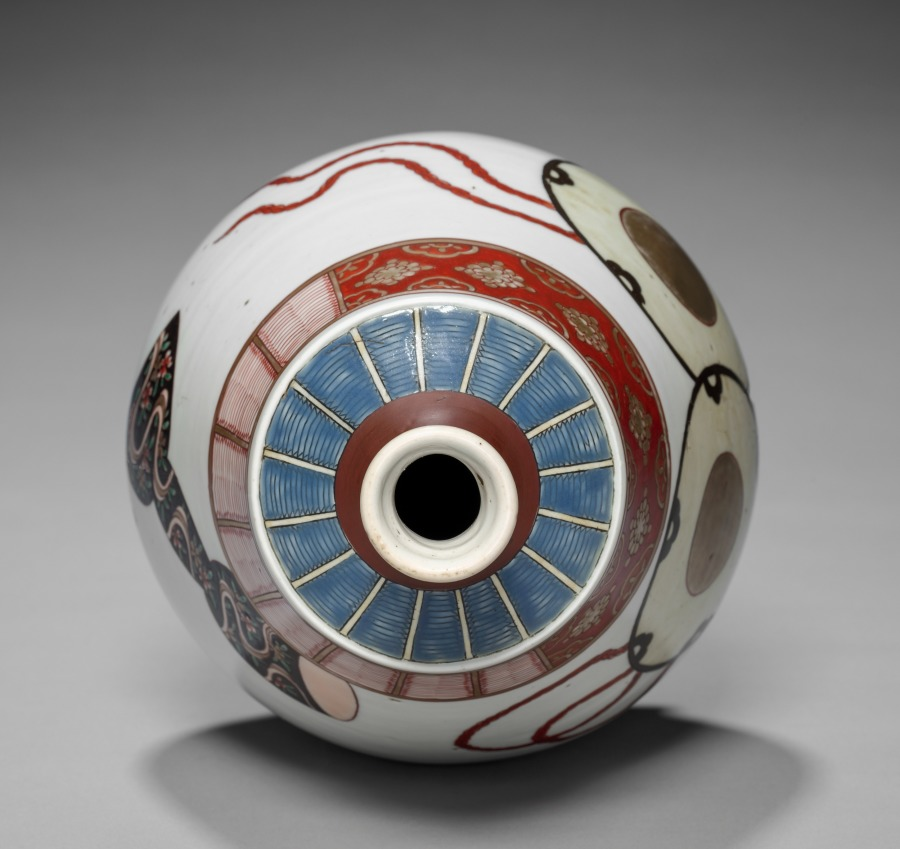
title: Bottle-Flask with Drums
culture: Japan, Edo period (1615–1868)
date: 1700s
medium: porcelain with overglaze color enamel (Hizen ware, Arita type, Imari style)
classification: Ceramic